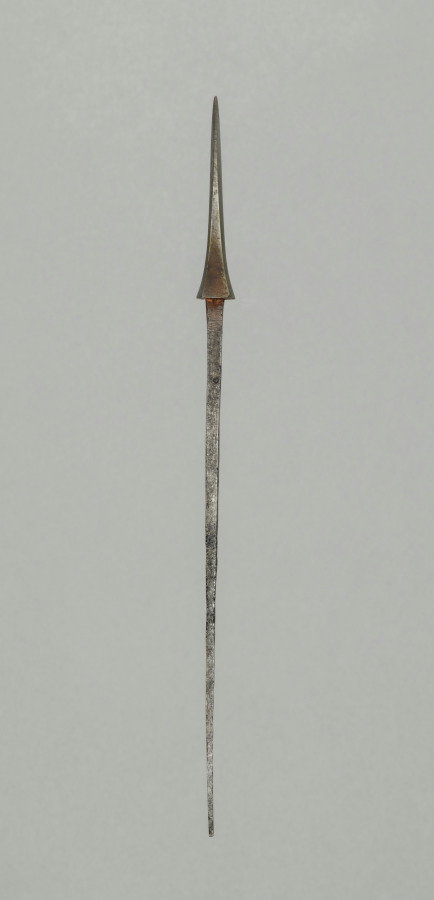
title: Arrow Point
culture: Japan, Edo period (1615–1868)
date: 1700s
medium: steel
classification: Arms and Armor